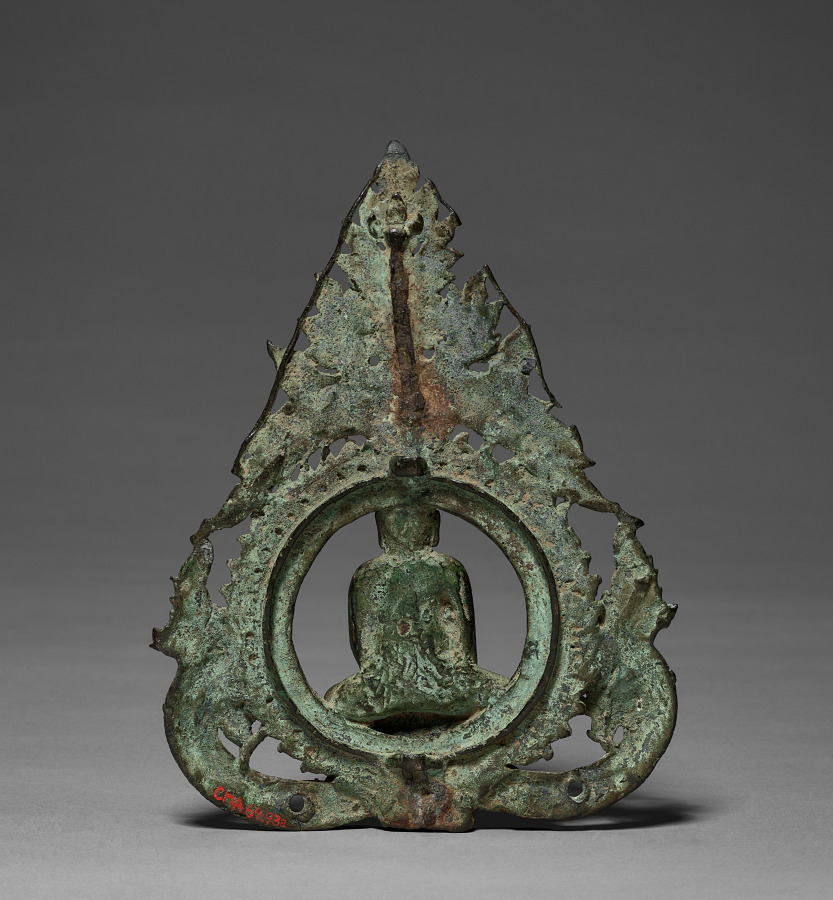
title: Finial with the temptation of Buddha by Mara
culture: Cambodia, reign of Jayavarman 7th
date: late 1100s–early 1200s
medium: bronze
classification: Sculpture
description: The Buddha sits surrounded by a circle of flaming jewels and full-blown lotus petals. Two rearing serpents emblematic of the glory of the Khmer Empire emerge from either side of his lotus pedestal. The Buddha’s right hand points down in the earth-touching gesture, and his left hand holds a round object, probably a special rice offering that indicates the Buddha’s power to ensure ongoing prosperity of the land. The branches of the pipal tree under which the Buddha reached enlightenment top the composition. Beneath his lotus pedestal, the earth goddess wrings the waters from her hair that wash away the army of Mara, the grimacing demons holding clubs and shields who flee to either side.